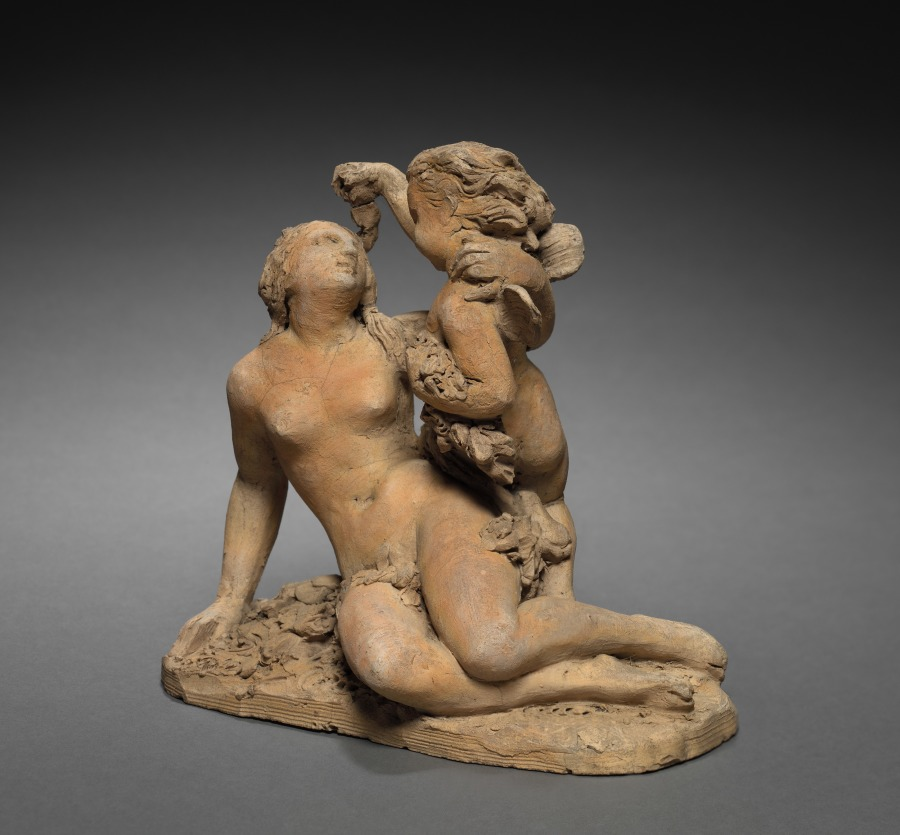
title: Venus and Cupid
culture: France, 19th century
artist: Jean-Jacques Feuchère (French, 1807–1852)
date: c. 1840–1850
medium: terracotta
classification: Sculpture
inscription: in ligature incised into base at front right corner: "Feuchere"; below are some marks that might be a date, but are illegible.